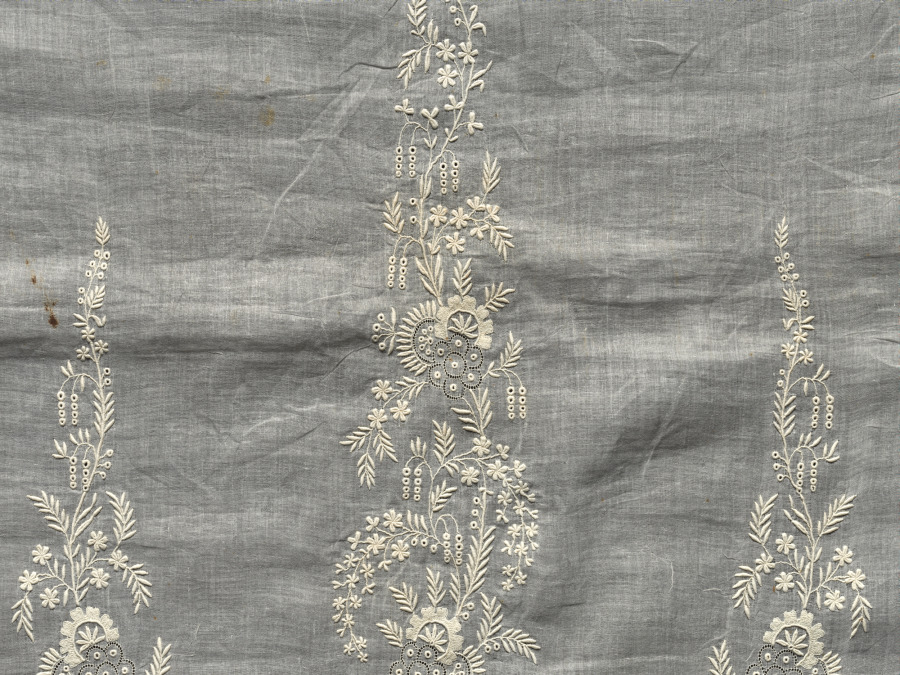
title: Embroidered Dress Front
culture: Madeira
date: c. 1850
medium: Plain weave cotton (est.): embroidered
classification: Embroidery